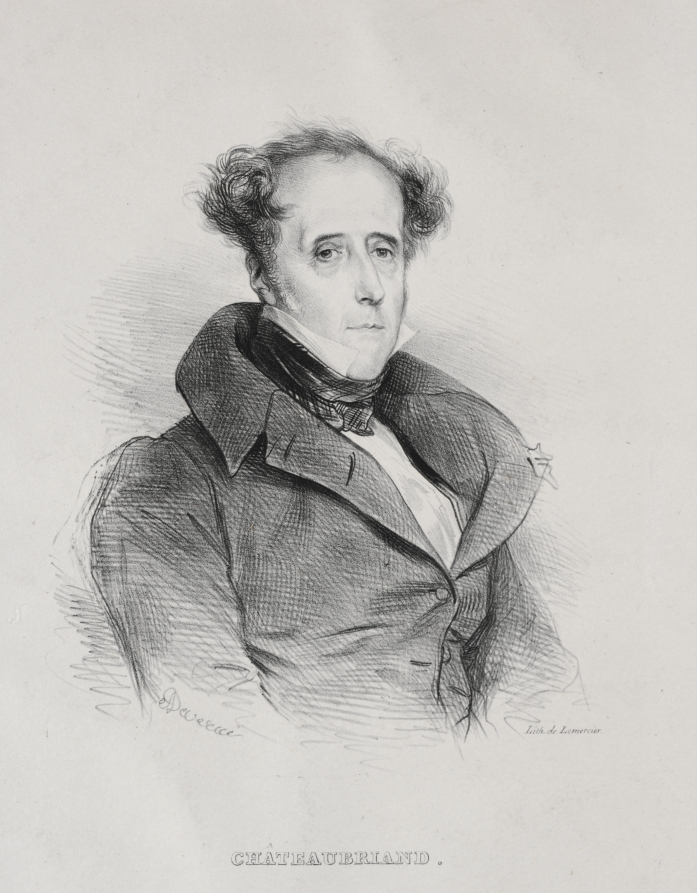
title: François René Auguste Victome de Châteaubriand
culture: France, 19th century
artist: Achille Devéria (French, 1800–1857)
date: c. 1830–49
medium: lithograph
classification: Print